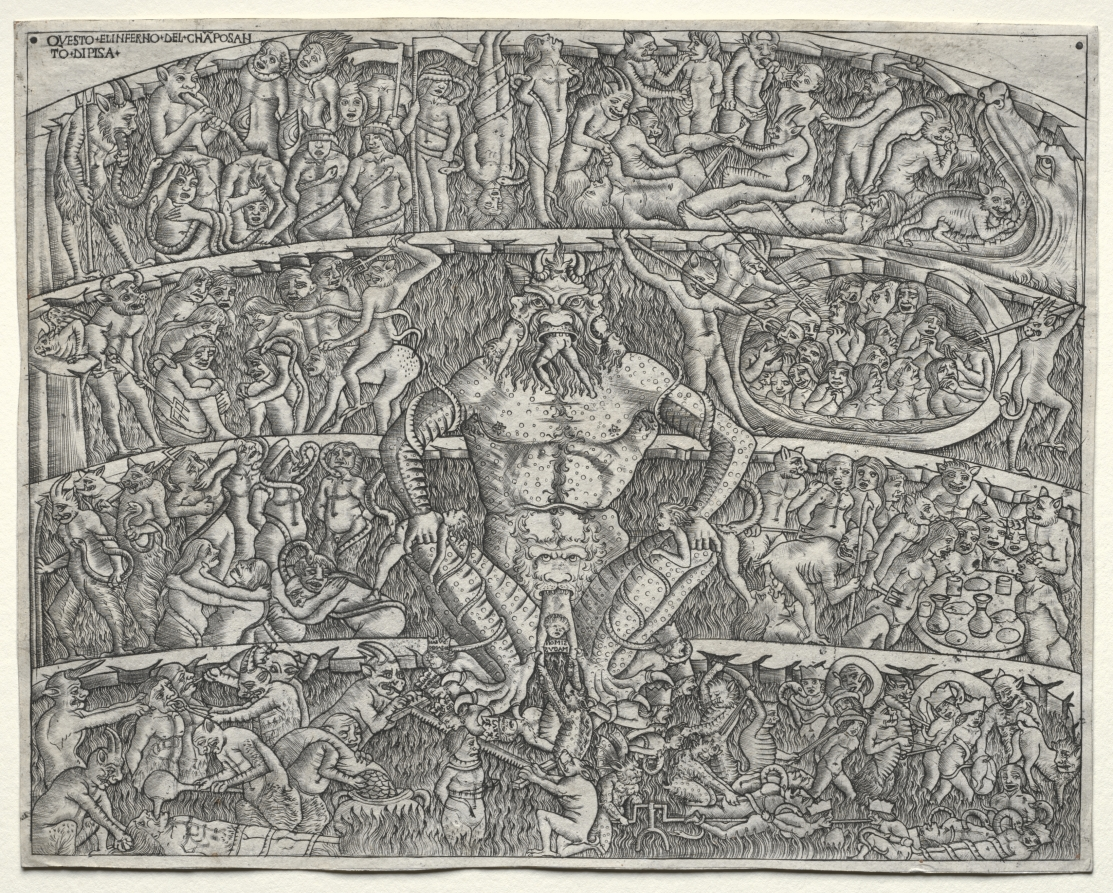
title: The Inferno According to Dante, after the Fresco in the Campo Santo at Pisa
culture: Italy, 15th century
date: 1400s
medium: engraving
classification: Print